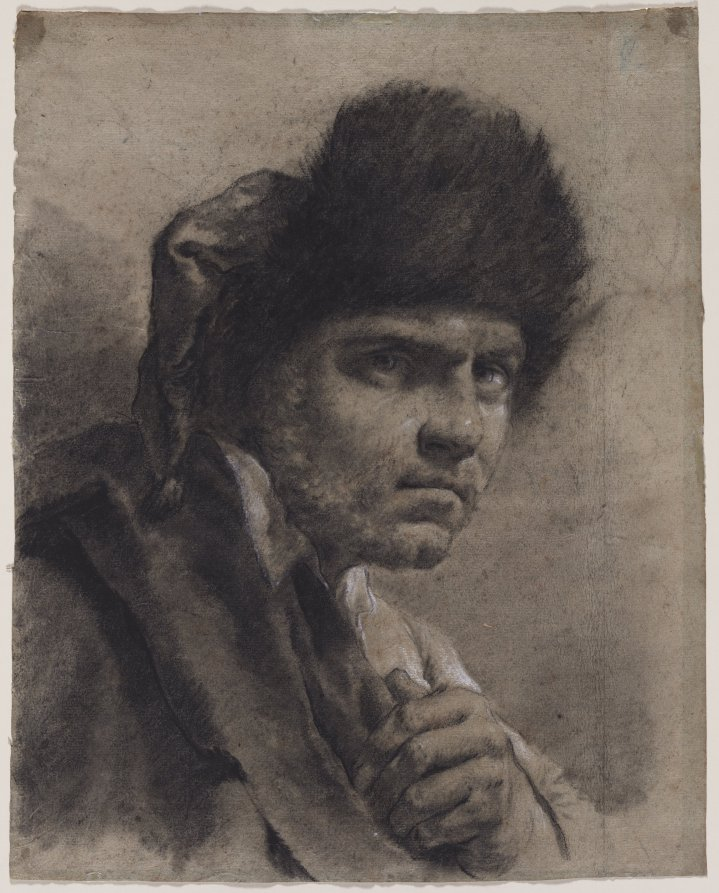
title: Man with a Fur Cap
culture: Italy, Venice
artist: Giovanni Battista Piazzetta (Italian, 1682–1754)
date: c. 1730/40s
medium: black chalk, stumped (and wetted?), with black chalk wash, heightened with white chalk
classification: Drawing